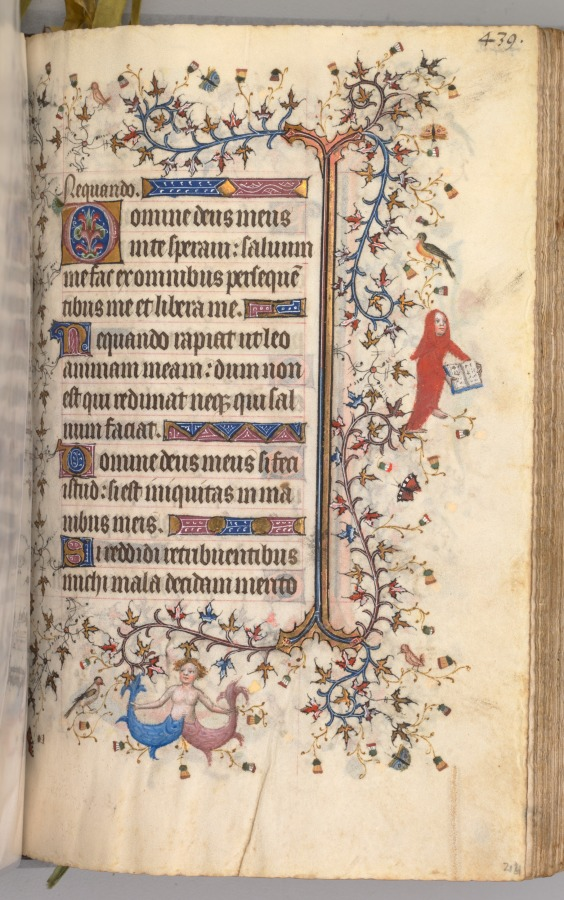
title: Hours of Charles the Noble, King of Navarre (1361-1425): fol. 214r, Text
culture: France, Paris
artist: Master of the Brussels Initials and Associates (French)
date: c. 1405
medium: ink, tempera, and gold on vellum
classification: Bound Volume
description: This precious volume was obviously highly prized by its owner, the French-born King of Navarre, who had his coat of arms painted on no less than twenty folios. Rather than directly commissioning this manuscript from a specific workshop, it seems that Charles the Noble acquired his book of hours -- perhaps ready-made for the luxury market -- while on a trip to Paris in 1404-05. A collaborative effort, six painting styles are evidenced within the pages of this codex, those of two Italians, two Frenchmen, and two Netherlanders. The painter who was responsible for the planning and decoration of the book, and who produced seventeen of the large miniatures, was a Bolognese artist known as the Master of the Brussels Initials. His principal assistant, responsible for most of the borders, was a Florentine who signed his name "Zecho" da Firenze on folio 208 verso.